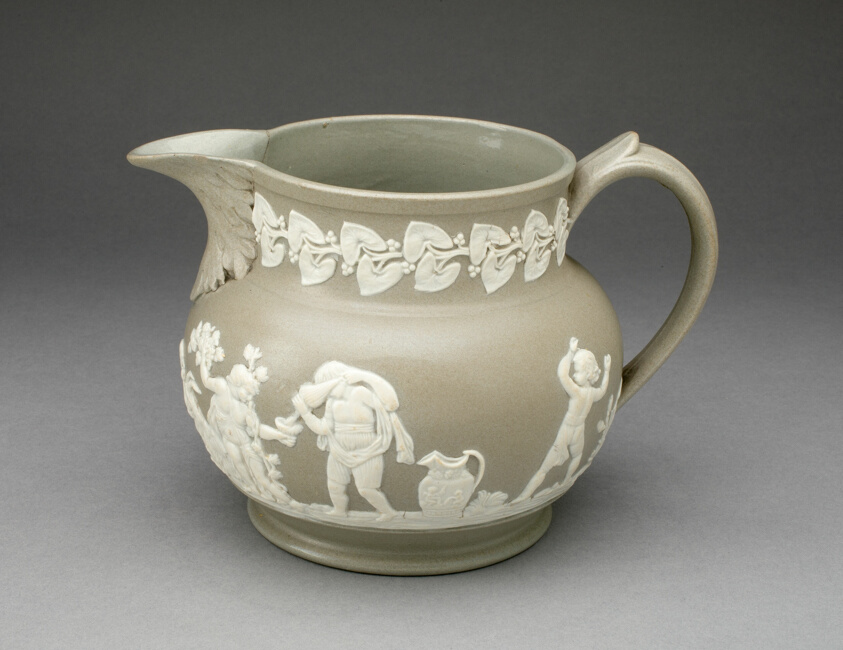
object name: Ceramics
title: Jug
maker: England, Staffordshire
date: c. 1800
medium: Stoneware (jasperware)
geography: Staffordshire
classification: tableware; stoneware; european decorative arts; ceramics